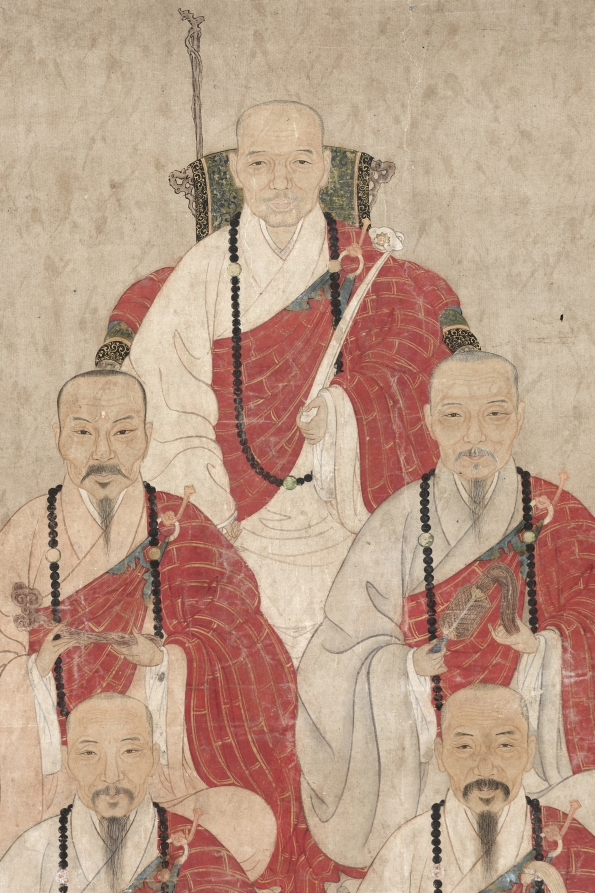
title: Lineage Portrait of Buddhist Monks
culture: China, Qing dynasty (1644–1911)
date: 1600s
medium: hanging scroll mounted on a panel (framed); ink, color, and gold on paper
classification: Painting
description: This painting features 24 Buddhist priests, likely of several generations and members of the same temple or school. The priests are depicted with attention to individual features and appearances, dressed in their formal garments. They may represent monks of the Ōbaku school, a form of Chan (Japanese: Zen) Buddhism founded in Japan by Chinese émigré monks and their Japanese followers.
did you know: The painting has remnants of a Japanese mounting, indicating that it was once kept in Japan.